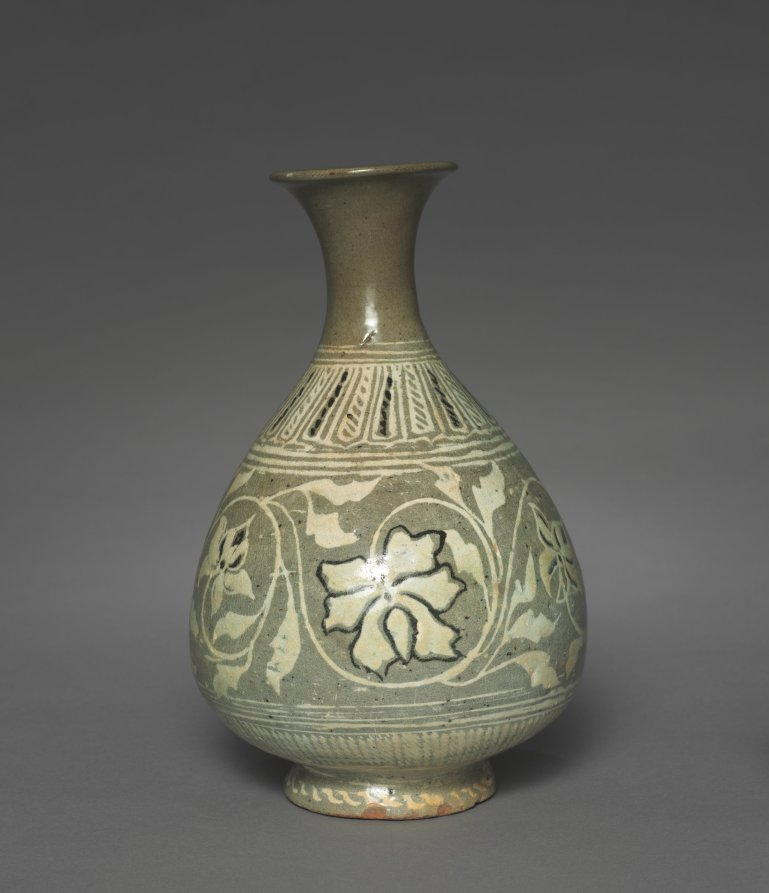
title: Bottle Inlaid with Peony and Scroll Design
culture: Korea, Joseon dynasty (1392–1910)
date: 1400s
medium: stoneward with inlaid, incised, and sgraffito design (Buncheong ware)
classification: Ceramic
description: Produced in both central and provincial kilns during during the 1400s–1500s, Buncheong (literally means "powdered green"), like this wine bottle commonly feature gray-green glaze due to the usage of less processed and refined clay high in iron. Many experimental techniques: white slip, inlay, stamping, and incising, which had been explored and perfected by Goryeo-period artists, were also adopted for bucheong pottery, yet resulting bold and whimsical visual impacts, completely different from elegant and refined Goryeo celadons.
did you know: The term buncheong, which refers to this type of pottery, means "powdered gray-green glazed ceramics.”